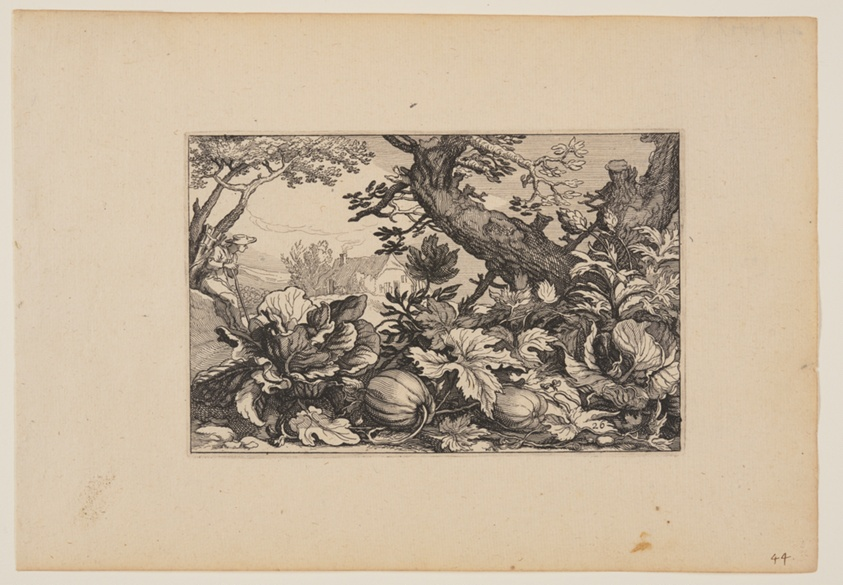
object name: Print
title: Tree and Melons, from Landscapes (Verscheyden aerdige Lanthuysen...)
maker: Claes Jansz. Visscher (Netherlandish, c. 1550–c. 1612); after Abraham Bloemaert (Dutch, 1566–1651)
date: 1620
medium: Etching on ivory laid paper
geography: Netherlands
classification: print; paper; prints and drawing; etching